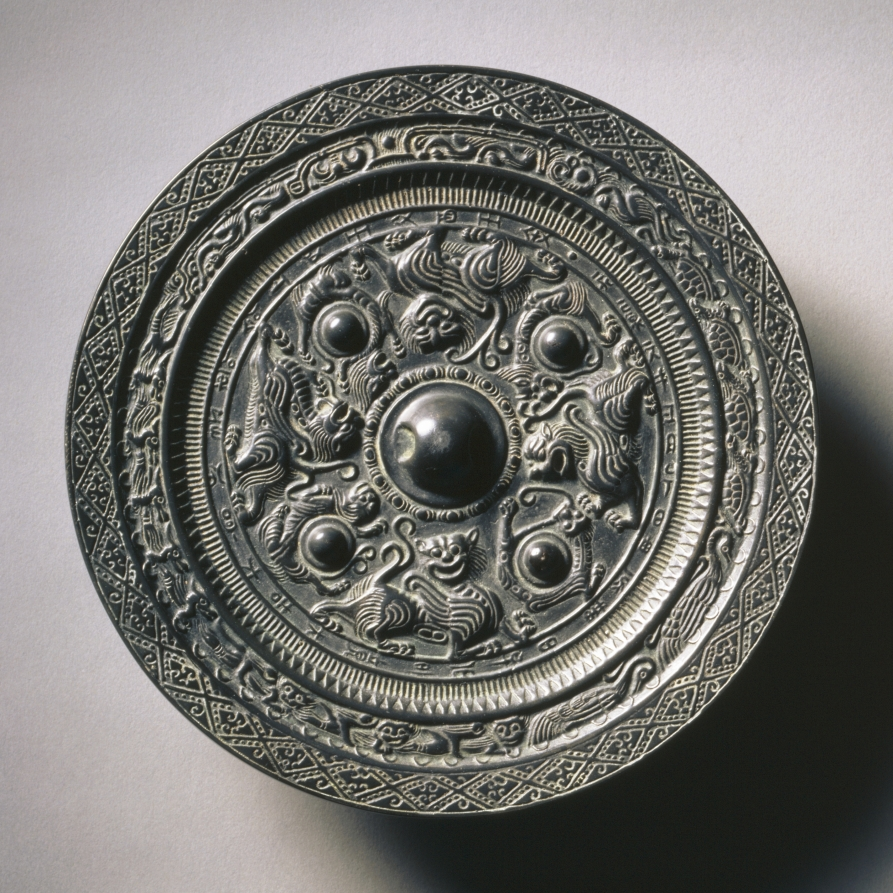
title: Mirror with Four Nipples and Eight Animals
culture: China, Western Jin dynasty (265-316 CE)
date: 300 CE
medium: bronze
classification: Metalwork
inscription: 永康元年正月午日，由（幽）【涑】黃日（白）。 早作明鏡，大吉大宮（富）。 延長壽命，上有王父西王母。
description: Inscription: On the day of wu, the first month, the first year of Yongkang, I made the bright mirror at the first of dawn by refining the yellow and the white [metals]. Great fortune and wealth will come as a result. May you live a long life. Up above are the King Father [of the East] and the Queen Mother of the West.